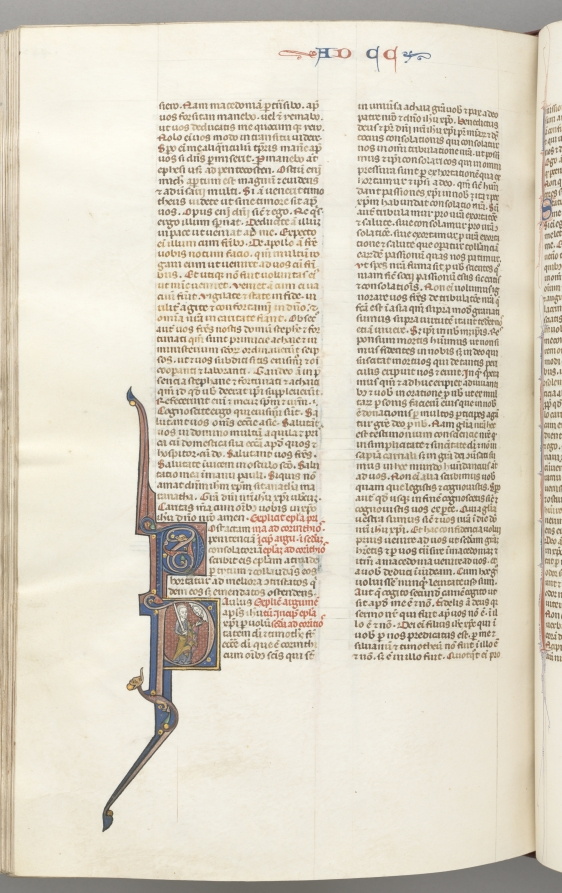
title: Fol. 445v, Corinthians II, historiated initial P, Paul standing with a sword, talking to the bust of God above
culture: Southern France, Toulouse(?), 13th century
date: c. 1275–1300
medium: ink, tempera and gold on vellum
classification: Bound Volume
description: Biblical manuscripts were highly prized and important possessions of churches, monasteries, cathedral schools, and universities throughout medieval Europe. The biblical texts were known as the vulgate, the translations made by Saint Jerome in the fourth century from Hebrew and Greek into Latin, which became the definitive and official Latin version of the Roman Church. In the 13th century, the bible was, for the first time, produced as a single volume with an officially sanctioned sequence to its books and chapters as illustrated by this example. The very extensive decoration of this bible is arranged hierarchically to indicate the relative importance of the various texts so that full or almost full-page initials mark the openings of the first prologue, Genesis, and the first Gospel; historiated initials mark the beginning of each book and illuminated initials mark the Prologues.